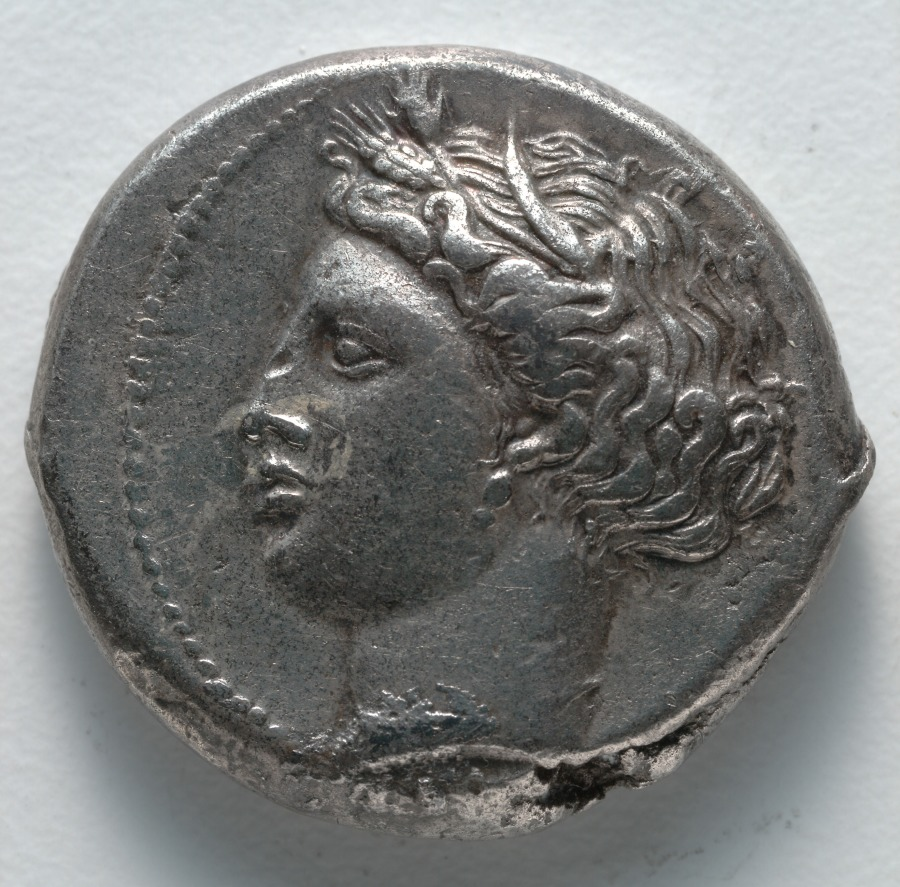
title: Tetradrachm: Head of Tanit-Persephone (obverse); Horse (reverse)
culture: Greek, Siculo-Punic, probably minted at Lilybaion (Sicily)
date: c. 350–320 BCE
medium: silver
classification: Coins